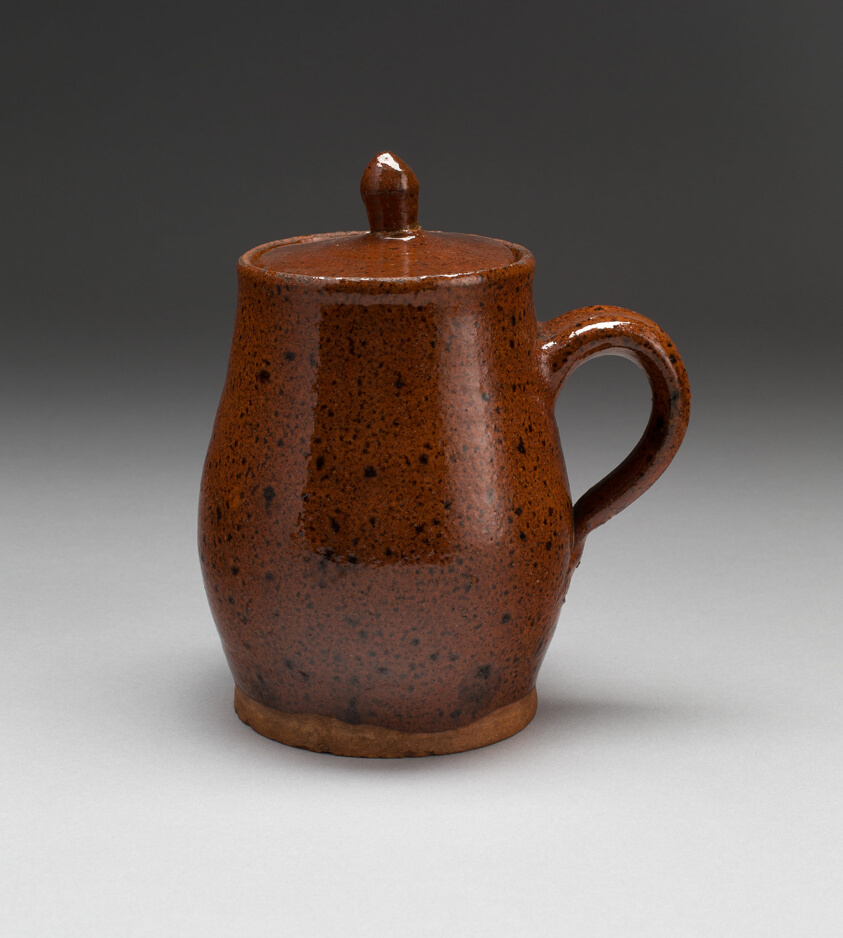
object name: Ceramics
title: Covered Jar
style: Folk Art, americas, 19th century, 18th Century, pennsylvania german, american colonial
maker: Artist unknown (American, 18th–19th century); Possibly Pennsylvania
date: 1780–1820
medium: Earthenware (buff body) and clear lead glaze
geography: Pennsylvania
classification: vessel; american decorative arts; american arts; ceramics; decorative arts; pottery